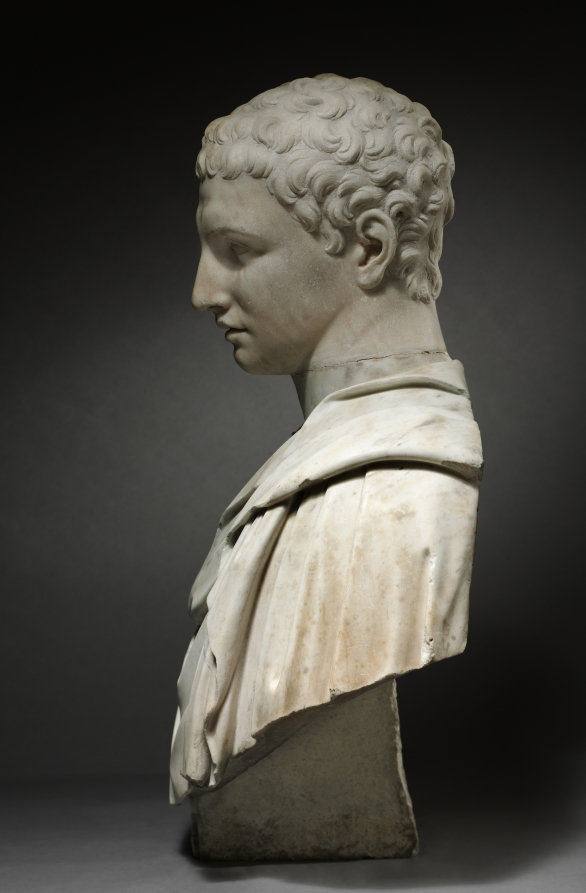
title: Bust of a Roman General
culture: Italy, 16th century or later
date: 1500s or later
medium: marble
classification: Sculpture